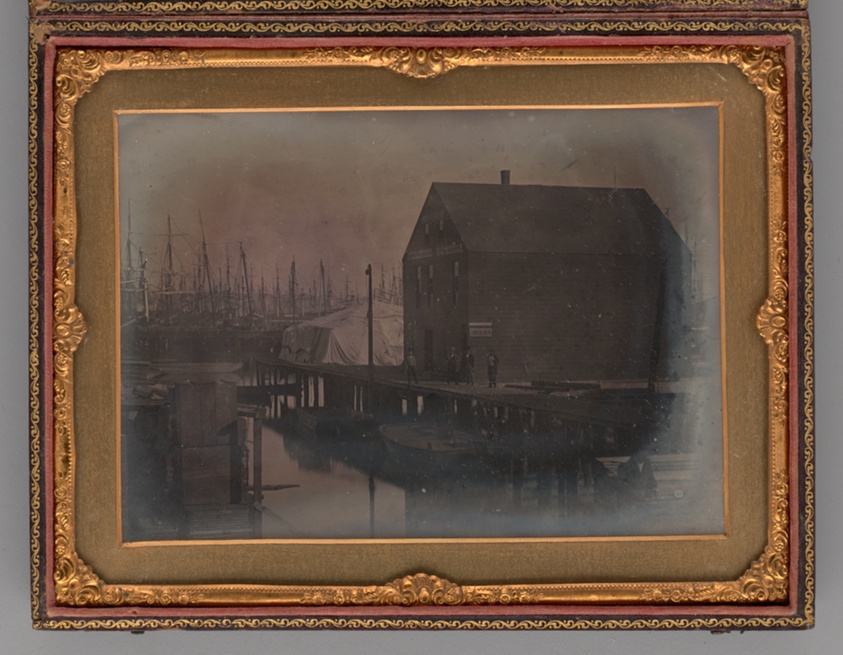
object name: Photograph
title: Untitled (Warehouse on Wharf)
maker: Unknown maker; American, 19th century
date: 1850-1855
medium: Daguerreotype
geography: United States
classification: portrait; daguerreotype; portrait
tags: lundberg collection